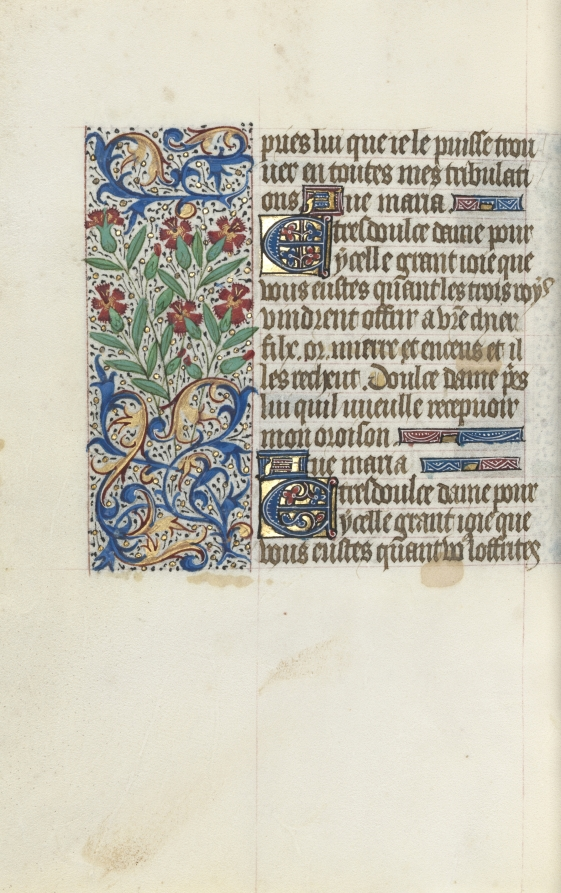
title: Book of Hours (Use of Rouen): fol. 148v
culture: France, Rouen, 15th century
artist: Master of the Geneva Latini (French, active Rouen, 1460–80)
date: c. 1470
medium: ink, tempera, and gold on vellum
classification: Bound Volume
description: In the late 1400s and early 1500s Rouen was an established and important center of book production. The city’s cathedral had a wealthy chapter that spent large sums of money to commission books and to maintain its extensive library. The stationers and booksellers would have likely been concentrated in or near the cathedral precinct. This artist, named after a manuscript now in Geneva, was Rouen’s principal illuminator during the second half of the 1400s.